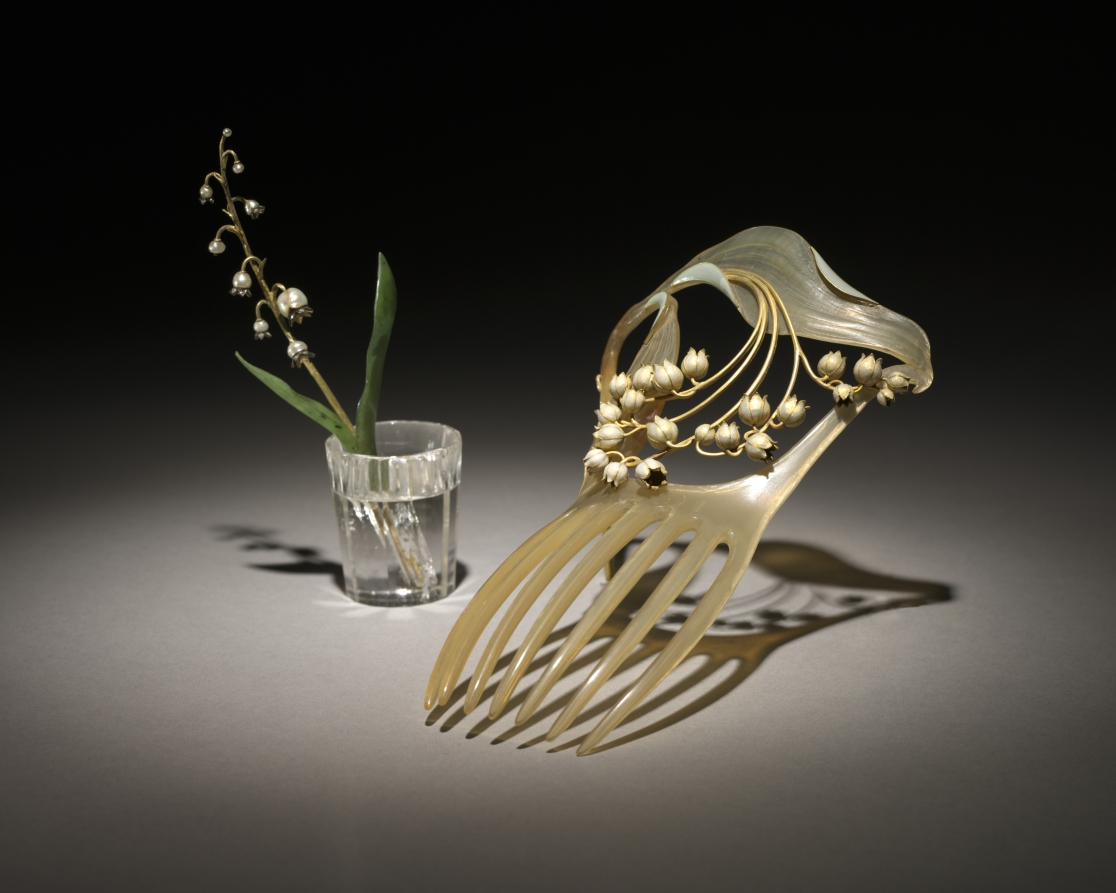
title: Lily of the Valley Comb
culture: France, early 20th Century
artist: René Lalique (French, 1860–1945)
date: c. 1900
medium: horn, enamel and gold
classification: Jewelry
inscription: Engraved on side of gold stem: "LALIQUE"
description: This comb was purchased by Cleveland native Jeptha Homer Wade II from Lalique after admiring the designer's work at the 1900 Exposition Universelle in Paris, probably for his wife Ellen Garretson Wade. Pearlescent horn forms the leaves of the lily of the valley, out of which the delicate, bell-shaped enamel flowers emerge.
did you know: Lalique valued the use of horn for its transparent qualities and natural color.